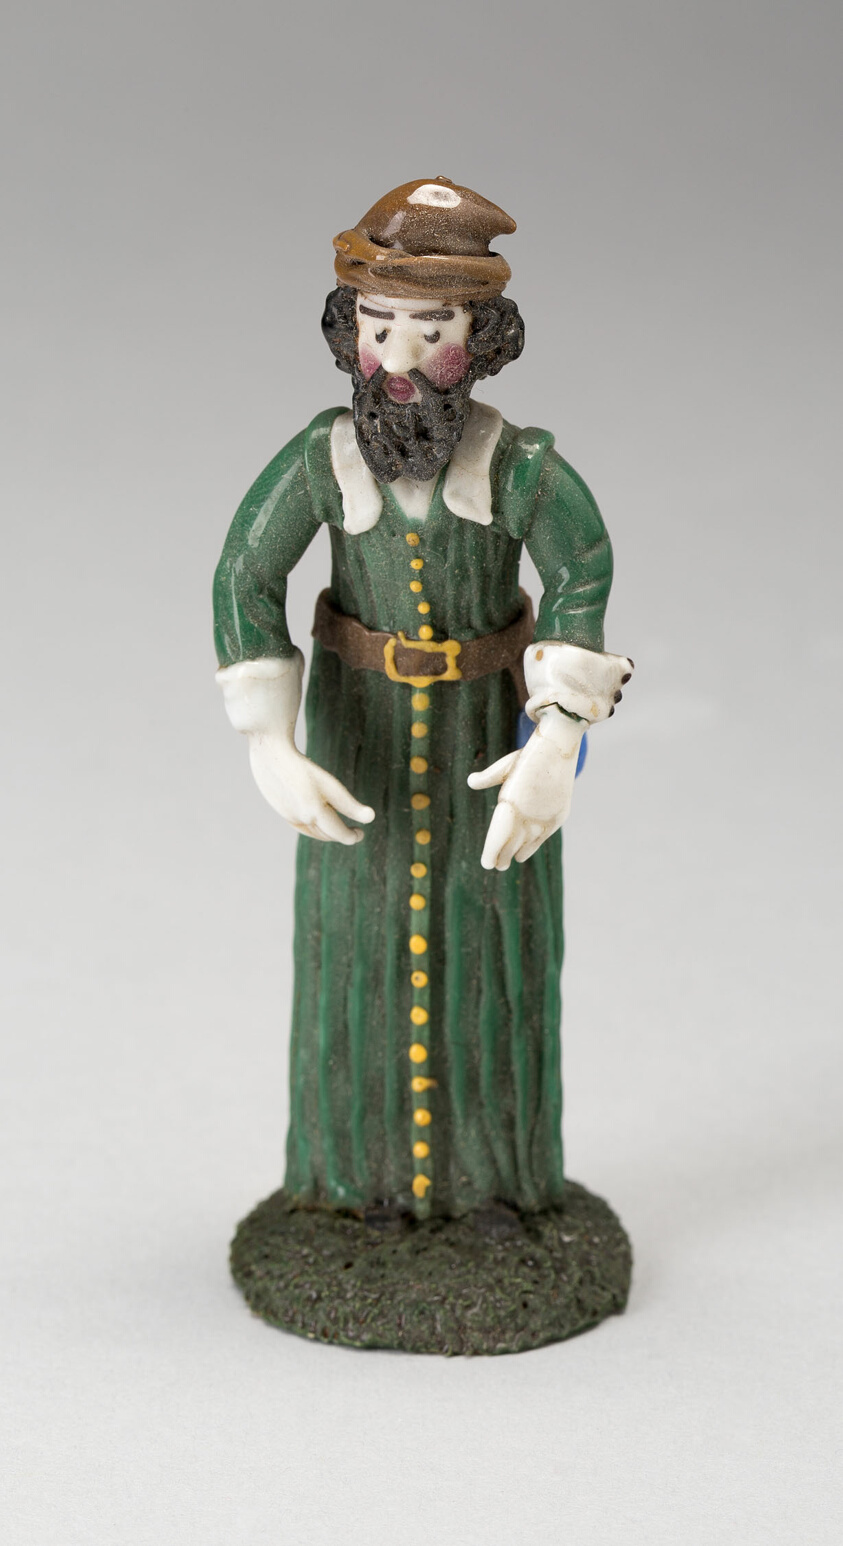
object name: Glass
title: Man in Green Robe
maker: Nevers, France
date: 18th century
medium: Glass; lampwork (verre de Nevers), metal armature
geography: France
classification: decorative object/ornament; lampwork; glass; european decorative arts